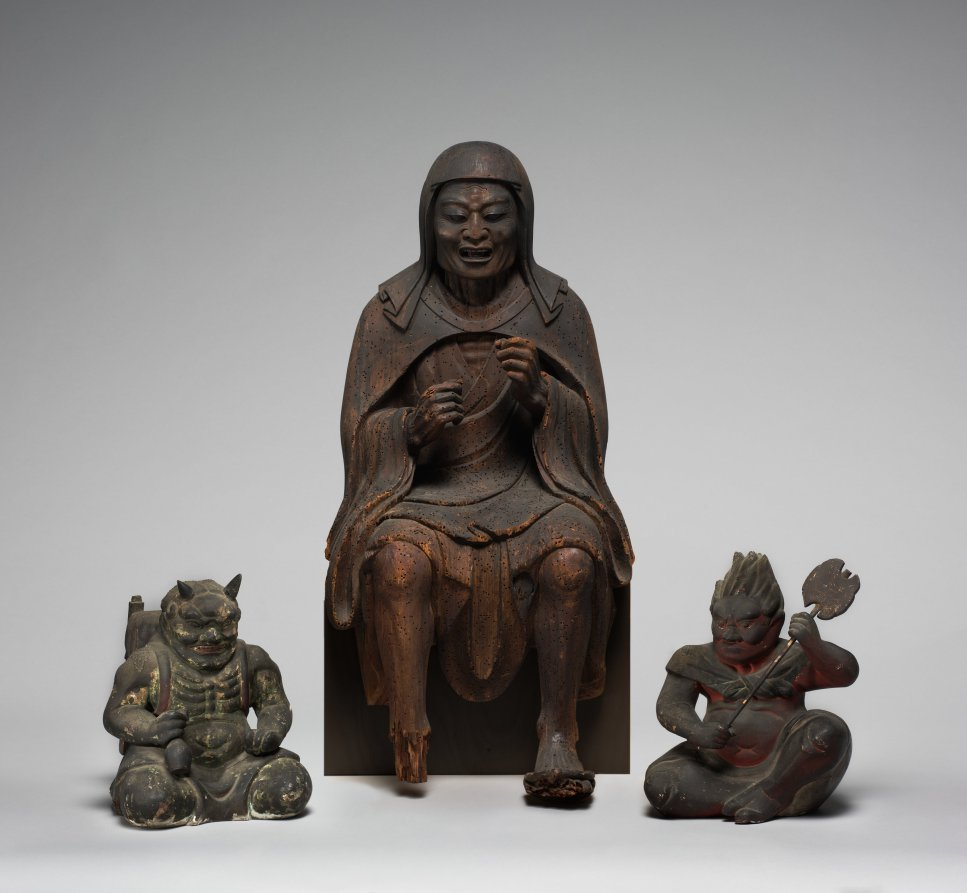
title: En no Gyōja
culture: Japan, Kamakura period (1185–1333)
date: 1200s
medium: wood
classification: Sculpture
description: This Buddhist monk is known as En no Gyōja, or “En the Ascetic” (legendarily 634–701), who is said to have founded Shugendō, a style of religious practice focused on performing challenging, rigorous tests of courage and devotion in mountainous settings.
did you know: This sculpture was once flanked by the demons Zenki and Koki (CMA 2012.40).